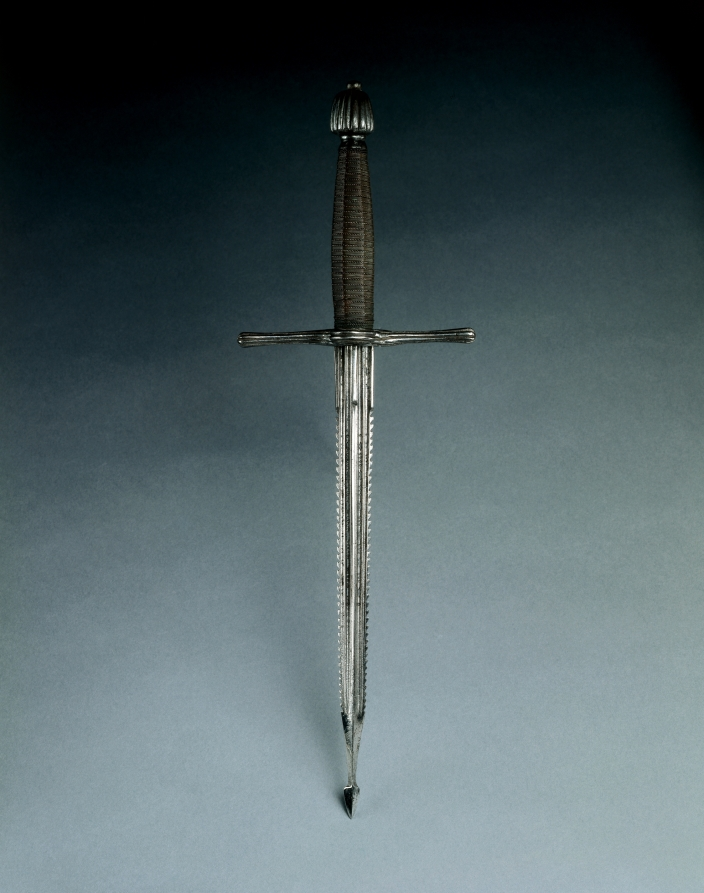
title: Parrying Dagger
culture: Italy, late 16th - early 17th Century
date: c. 1580–1610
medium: steel, copper wire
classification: Arms and Armor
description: The perforations within the blade were meant to provide elasticity, preventing it from snapping during vigorous parries. The serrations were arranged not for producing an unpleasant wound, but to "catch" the adversary's blade.